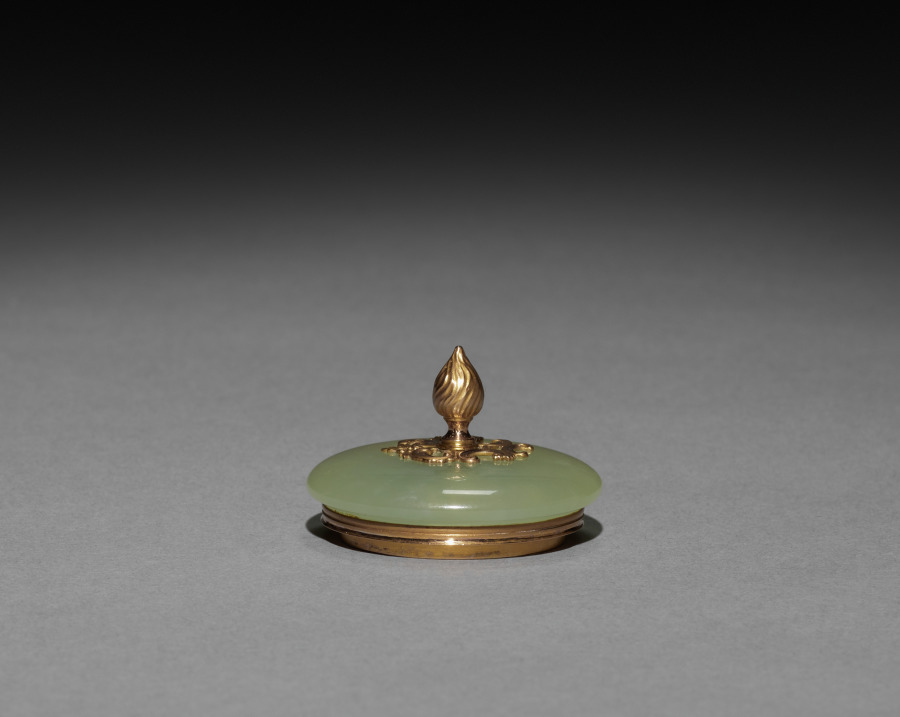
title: Cover for a Miniature Teapot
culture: Russia, St. Petersburg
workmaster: Mikhail Evlampievich Perkhin (Russian, 1860–1903)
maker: House of Fabergé (Russian, 1842–1918)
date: 1886–96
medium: gold, bowenite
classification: Miniature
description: The House of Fabergé specialized in the creation of little treasures intended as opulent personal gifts. In creating luxurious accessories for a desk or tabletop, Fabergé often used native hardstones such as multicolored agate and quartz, green nephrite, pink rhodonite, rock crystal, and pale green bowenite found in the Ural Mountains of western Russia. Fabergé's designers often paired hardstones with gold mounts, particularly in the St. Petersburg workshop where the goldsmiths were concentrated.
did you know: Sometimes called "new jade," bowenite is actually considered a semi-precious gemstone. Though Fabergé obtained his supply from the Ural Mountains of Russia, bowenite is also the state mineral of Rhode Island.